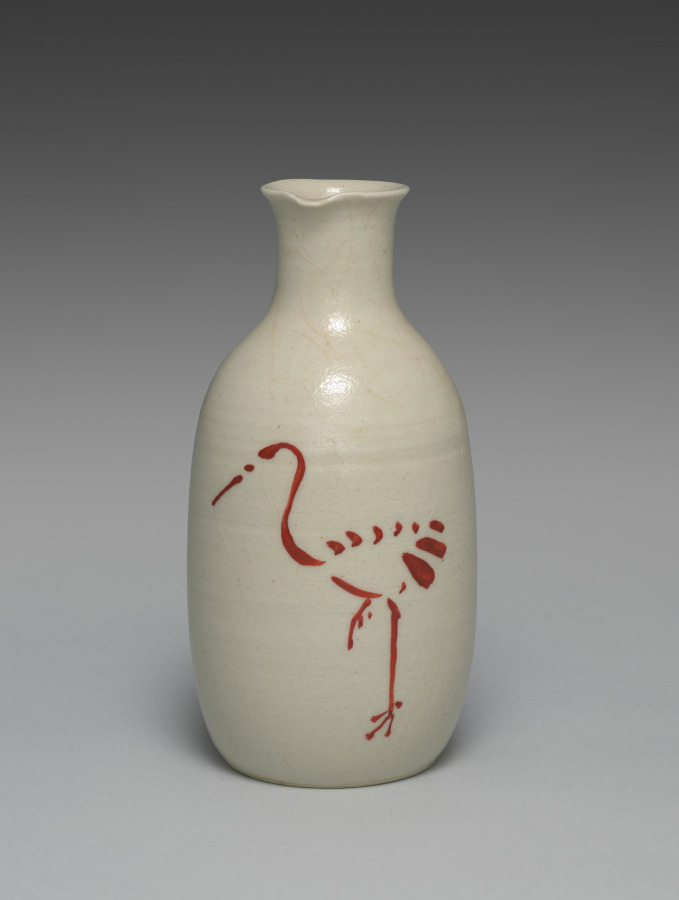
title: Crane Sake Pourer from Sake Pourers with Crane and Tortoises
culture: Japan, Meiji period (1868–1912)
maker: Seifū Yohei III (Japanese, 1851–1914)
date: 1893–1914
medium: One of a pair of sake flasks; porcelain with overglaze color enamel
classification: Ceramic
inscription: 爭食羣雞前，同遊者同志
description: This flask has a crane with a leg raised, while the other flask of this pair has stencil-like paintings of three turtles—a young one with its parents. Cranes and turtles are well-recognized symbols of longevity in East Asia, with the turtle said to live for ten thousand years and the crane for one thousand. Each flask also has a poem on the back, one in Chinese and the other in Japanese. The Chinese poem on this crane flask is two nonconsecutive five-character lines from a poem called “Crane Feelings” by the famous Tang dynasty poet Bai Juyi (772–846). One character in one of the lines has been altered. This creative poetic sampling results in a verse reading zheng shi qun ji qian, tong you zhe tong zhi 爭食羣雞前，同遊者同志. It could perhaps be translated, “before the flock of chickens competing for food, those traveling together have the same ambitions.”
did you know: This pair of seemingly humble sake pourers celebrate longevity and delight in a literary tradition that embraces multiple forms of poetic expression.